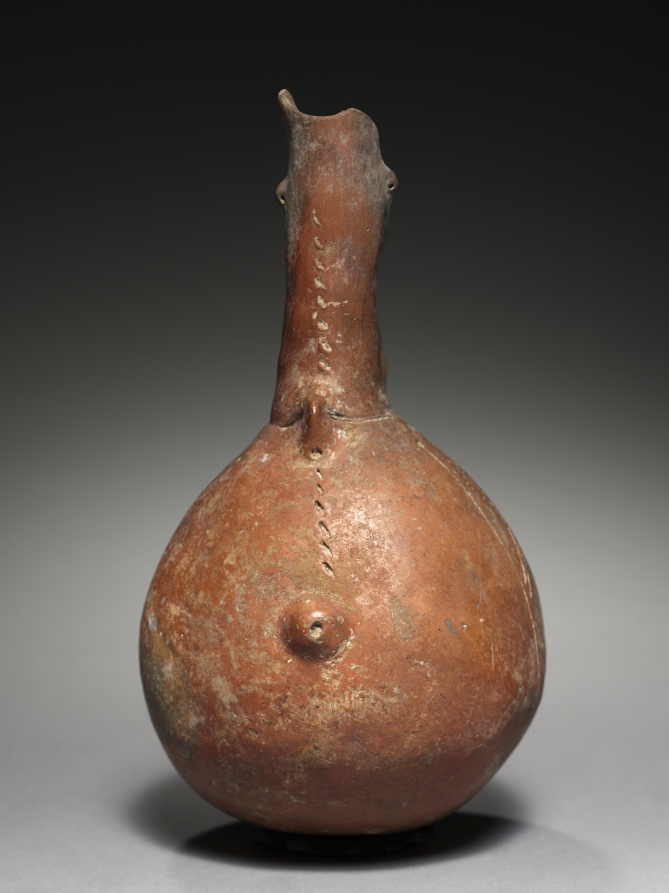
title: Jug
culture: Cyprus, early Cypriot III–middle Cypriot I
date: c. 2000–1800 BCE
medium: red ware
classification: Ceramic